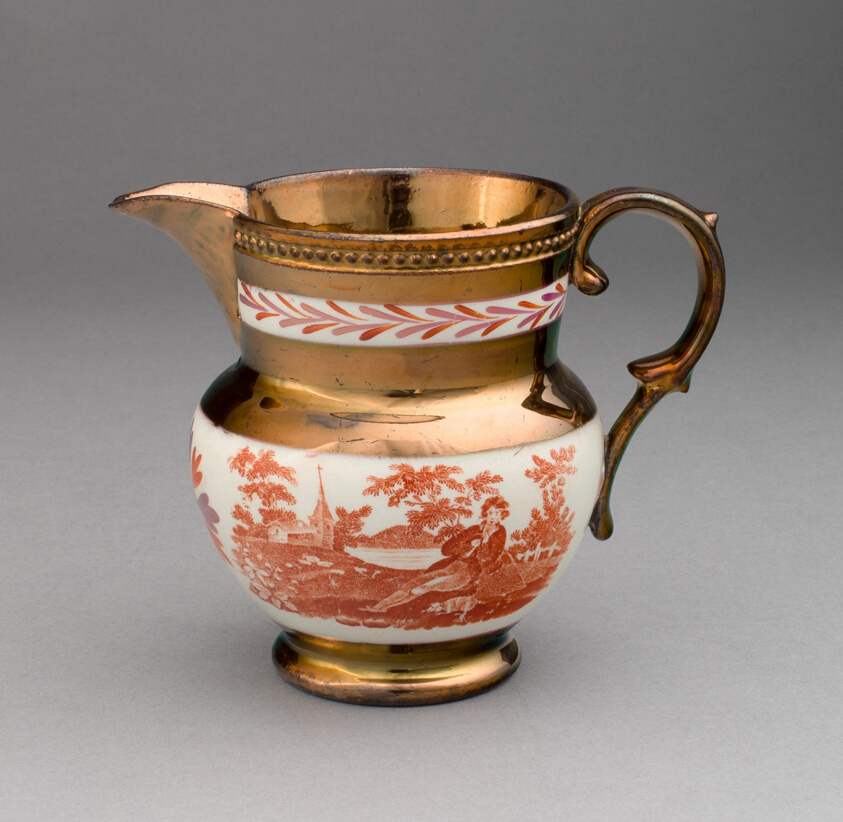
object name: Ceramics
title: Pitcher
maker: England, Staffordshire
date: 1810/20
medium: Lead-glazed earthenware with lustre decoration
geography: Staffordshire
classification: pitcher (vessel); vessel; earthenware; ceramics